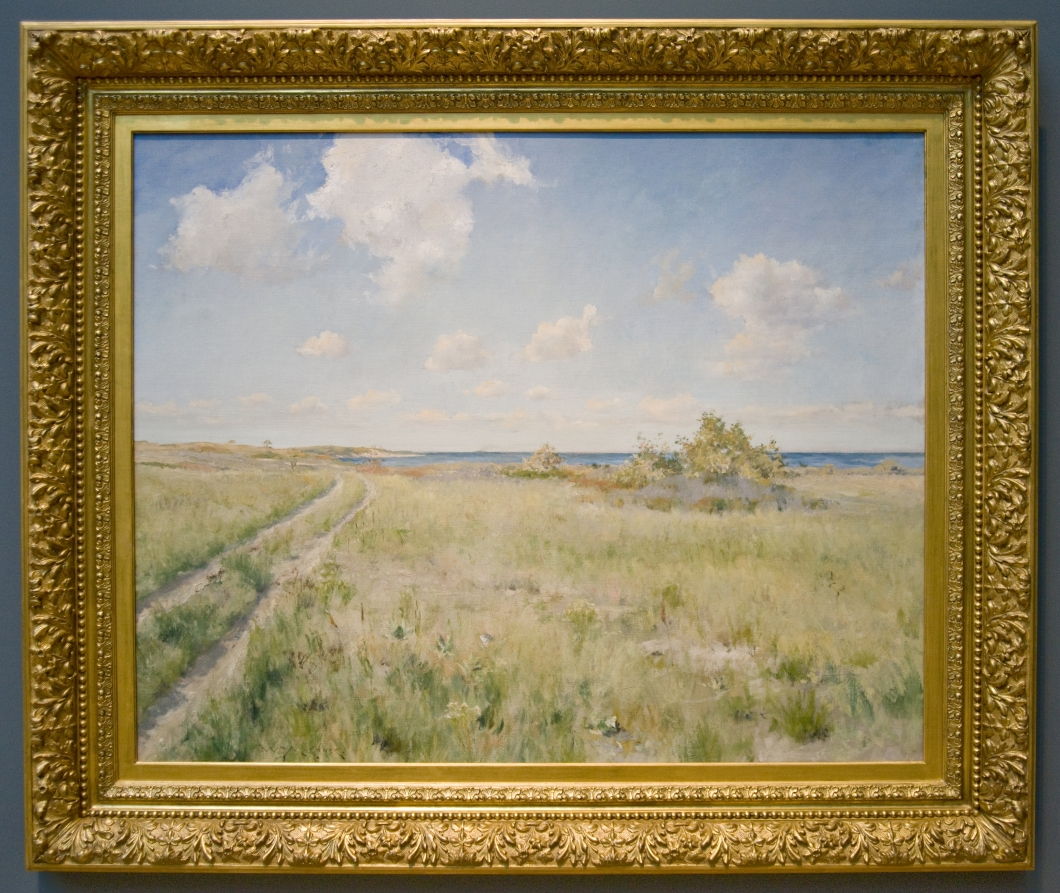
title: The Old Road to the Sea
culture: America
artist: William Merritt Chase (American, 1849–1916)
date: c. 1893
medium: oil on canvas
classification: Painting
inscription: signed lower left: WM M. Chase [WM in monogram]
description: One of the most influential of the American Impressionists, William Merritt Chase established his own summer school at Shinnecock, on the eastern tip of Long Island, New York. Attracted to the low-lying dunes and beaches, Chase and his students were among the first American artists to pursue open-air painting. With its varied brushwork and warm colors, this painting is among the finest works Chase produced at Shinnecock. The panoramic scene glows with the light of a summer day. The Chase school at Shinnecock, active from 1891-1902, was instrumental in expanding the influence of Impressionism in the United States.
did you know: Chase loved big dogs, variously owning a greyhound, a borzoi, and an Irish wolfhound.